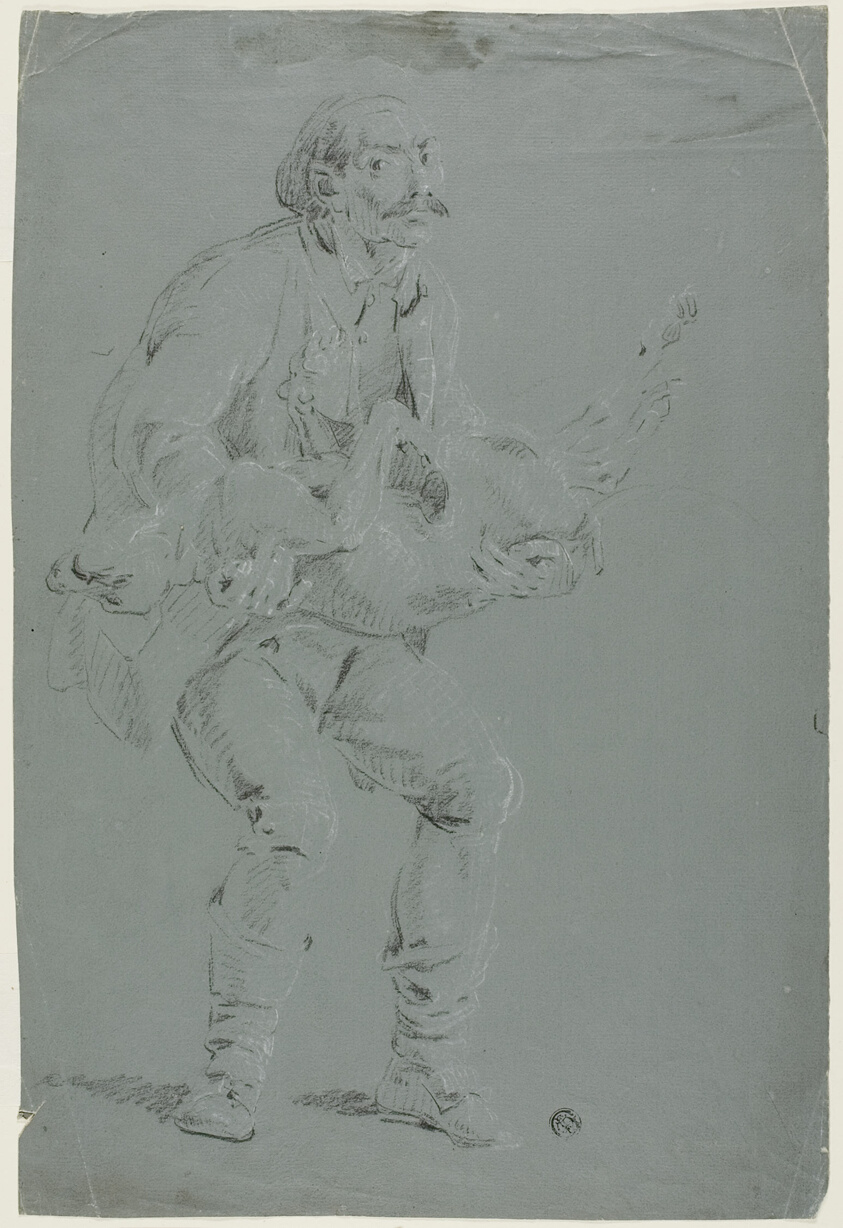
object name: Drawing and Watercolor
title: Man Carrying a Dead Dog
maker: Pierre-Jacques Volaire (French, 1729-1799)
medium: Black and white chalk, on blue-gray prepared ground, on ivory laid paper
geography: France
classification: chalk; drawings (visual works); prints and drawing